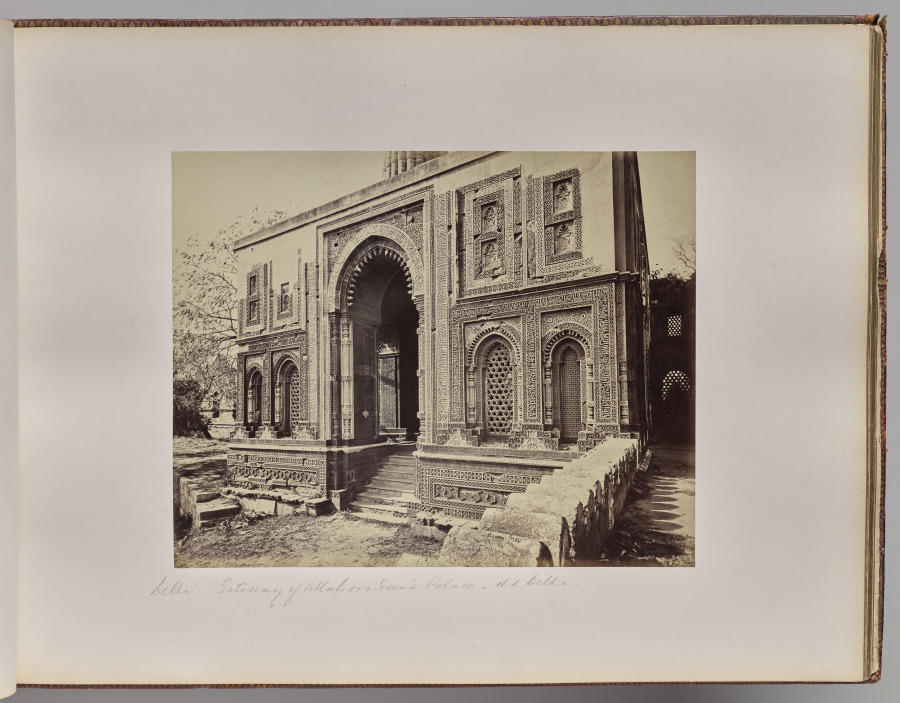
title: Delhi. Gateway of Allahood Deen's Palace, Old Delhi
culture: England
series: Photographs of Northern India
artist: Samuel Bourne (British, 1834–1912)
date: 1863–70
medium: albumen print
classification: Photograph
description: The 50 images in this album, all taken in the 1860s, move from the hill towns of the Himalayas down to cities including Lahore (now in Pakistan), Delhi, Lucknow, Agra, Benares (now Varansi), and Calcutta (now Kolkata). Architectural studies of major monuments offer valuable historical records of what sites such as the Taj Mahal and the imperial mosque of the Mughal emperors in Delhi looked like before 20th-century restorations.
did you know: Samuel Bourne, the author of most the images in this album, was a banker in England before he moved to India to become a professional photographer.